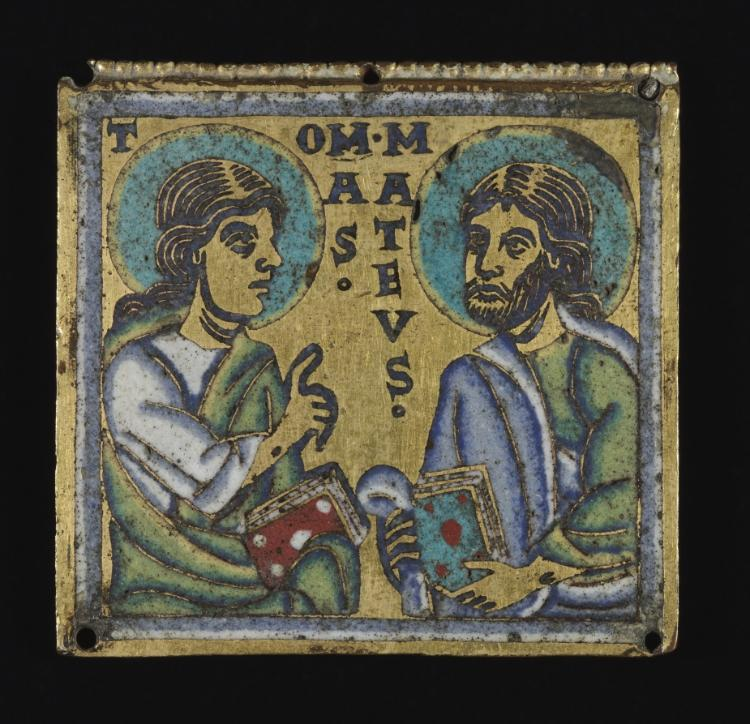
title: Plaque: Thomas and Matthew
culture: Mosan, Valley of the Meuse, Romanesque period, 12th century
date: c. 1160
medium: gilded copper, champlevé enamel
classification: Enamel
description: It is likely this pair of enamel plaques depicting the apostles Simon with Thaddeus and Thomas with Matthew once formed part of the decoration of a portable altar, a reliquary triptych, or some other kind of liturgical object.